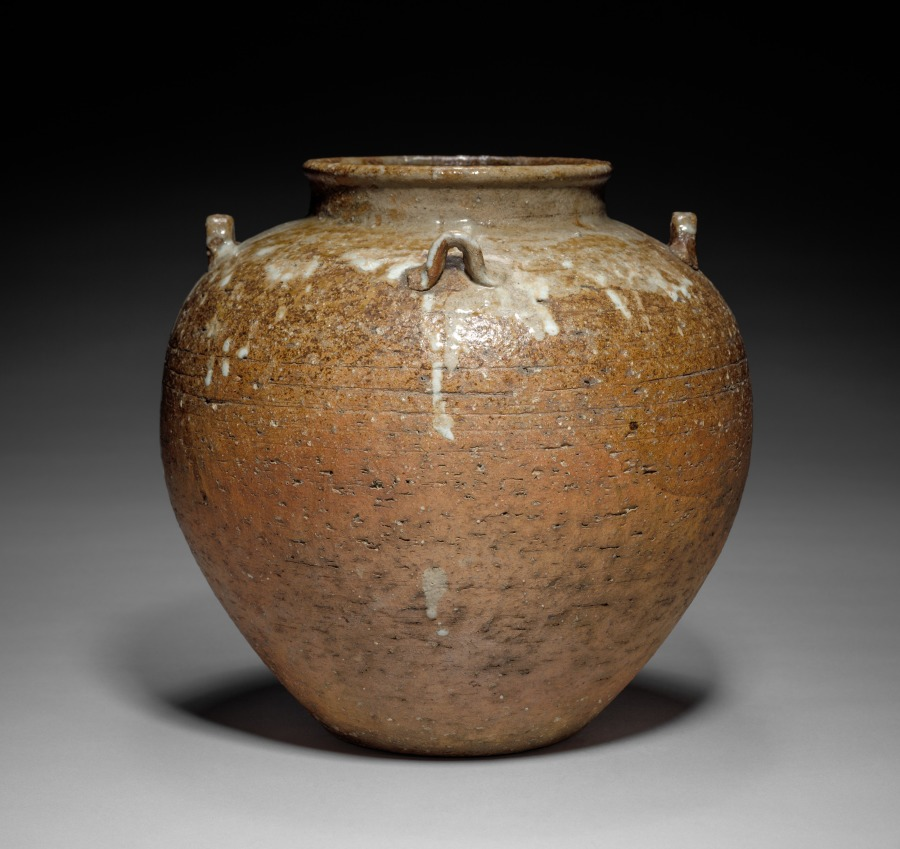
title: Tea Storage Jar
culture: Japan, Edo period (1615–1868)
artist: Nonomura Ninsei (Japanese, active 1640s–90s)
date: mid- to late 1600s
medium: Stoneware with white glaze (Shigaraki style)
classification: Ceramic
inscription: Ninsei seal impressed in the clay on bottom.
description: In this tea storage jar, Nonomura Ninsei reinterpreted a Shigaraki stoneware—made to hold agricultural products and known for its warm orange color, asymmetrical round forms, and irregular natural ash glazes—to produce a more refined piece that would appeal to tea masters seeking a touch of rusticity. In Japanese tea culture, hanging scroll paintings or calligraphy are placed in the tokonoma, or viewing alcove, for participants to admire and discuss along with the utensils used in the gathering. The scrolls are typically paired with vessels containing seasonal floral arrangements.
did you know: This jar may be considered an example of the aesthetic known as kireisabi, or refined rusticity.